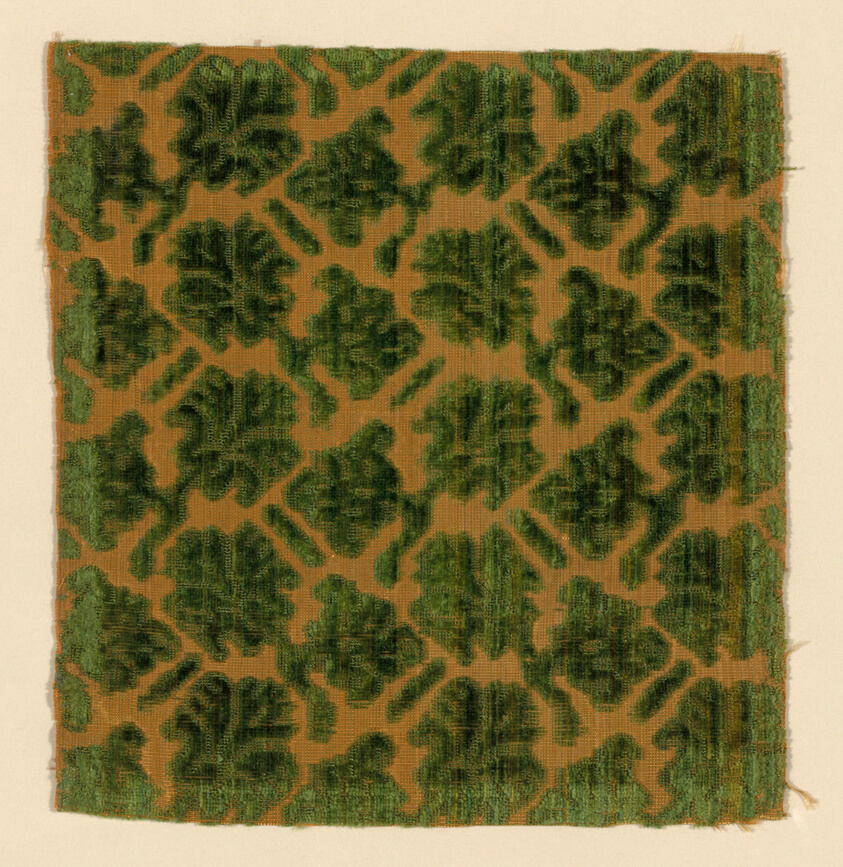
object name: Textile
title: Fragment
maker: Italy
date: Early 17th century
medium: cisele voided cloth velvet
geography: Italy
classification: textile; weaving - velvet; weaving